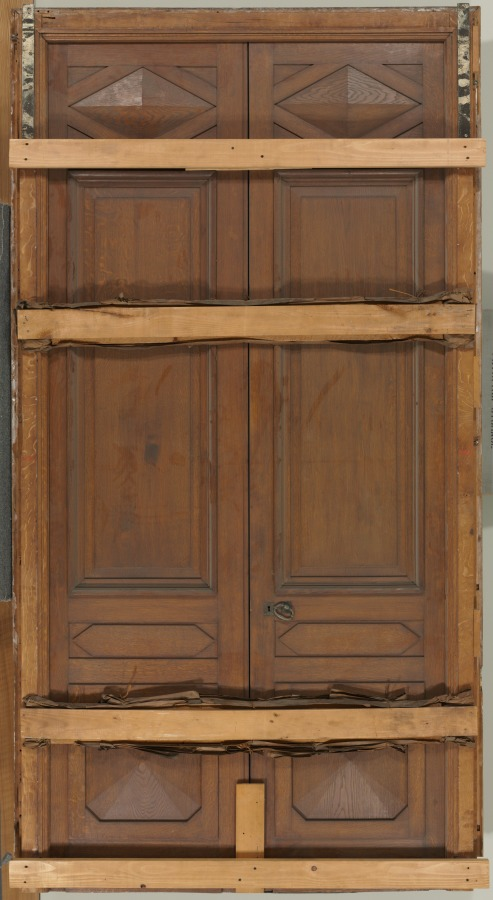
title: Overdoor Painting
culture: France, 18th century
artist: Pierre Rousseau (French, 1751–1829)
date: 1790s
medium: oil on canvas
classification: Painting